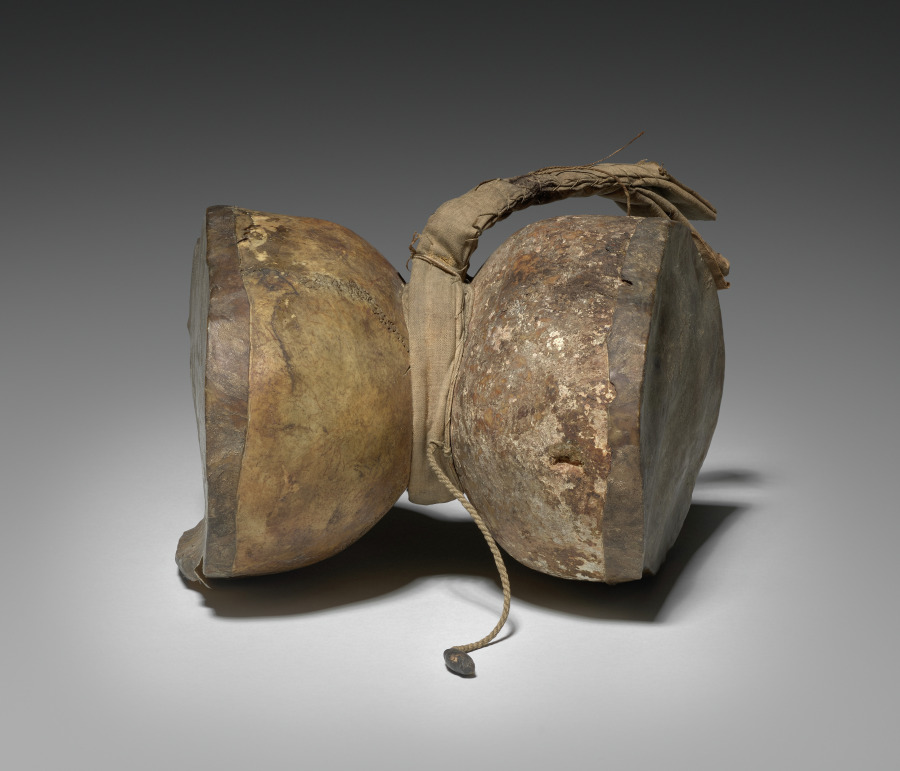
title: Ritual Drum (damaru)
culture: Tibet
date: c. 1800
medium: skull bone, cloth, hemp fiber, leather, and skin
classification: Musical Instrument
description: Damaru drums are made from the tops of two skulls joined in the center and sounded by rapidly turning it side to side so the ends of the cords fly up to sound against the stretched skin. In Hindu and Buddhist rituals, the rhythm of the damaru references the ongoing, relentless beat of time. The material of bone reminds practitioners of the inevitability of death in the course of time.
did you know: Dancing Shiva, in his form as Nataraja, holds a damaru in one hand.